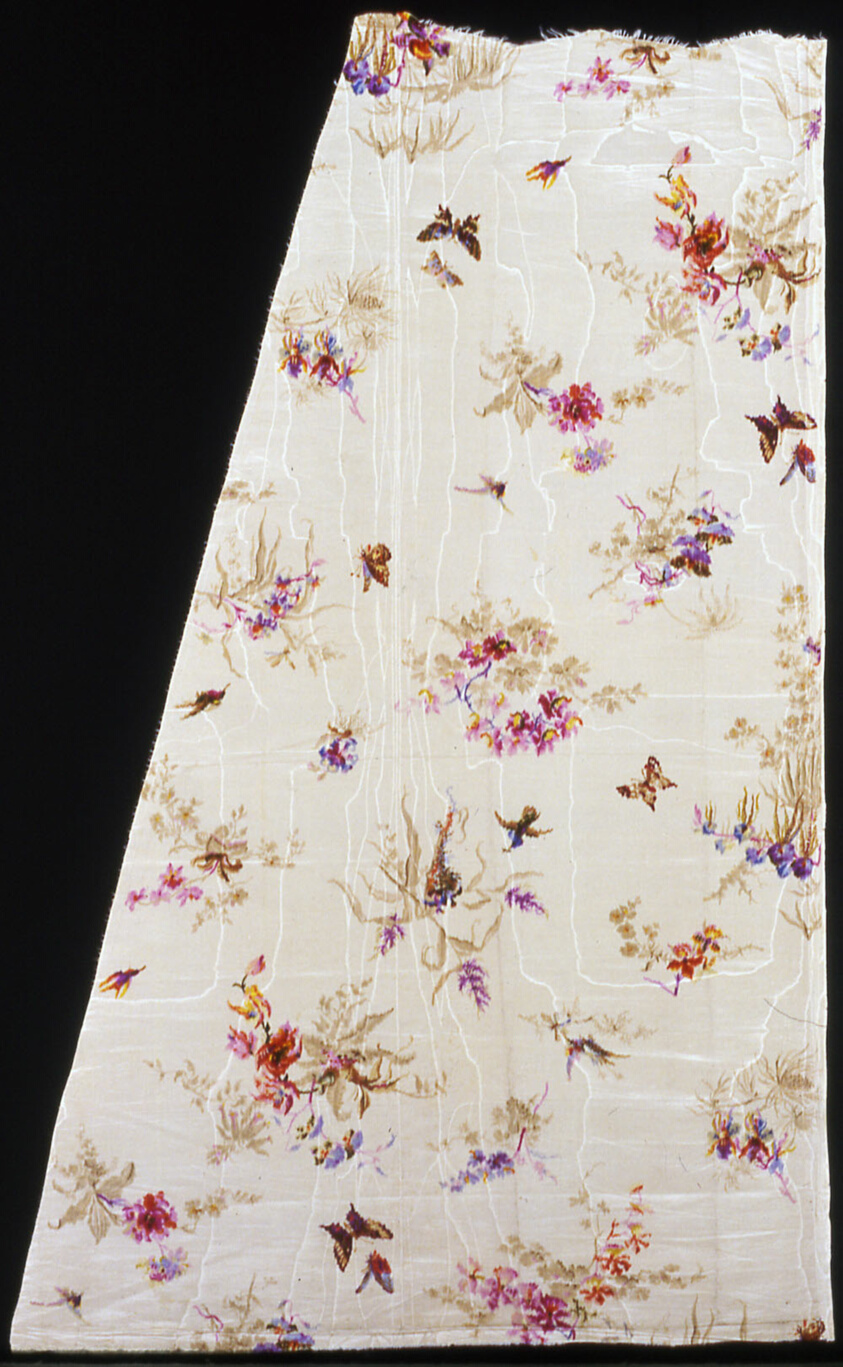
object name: Textile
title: Panel from Skirt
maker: England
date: 1850/1900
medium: Silk, plain weave; painted (chiné); watered (moiré)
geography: England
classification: textile; weaving - printed; costume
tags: foliage, butterflies, flowers